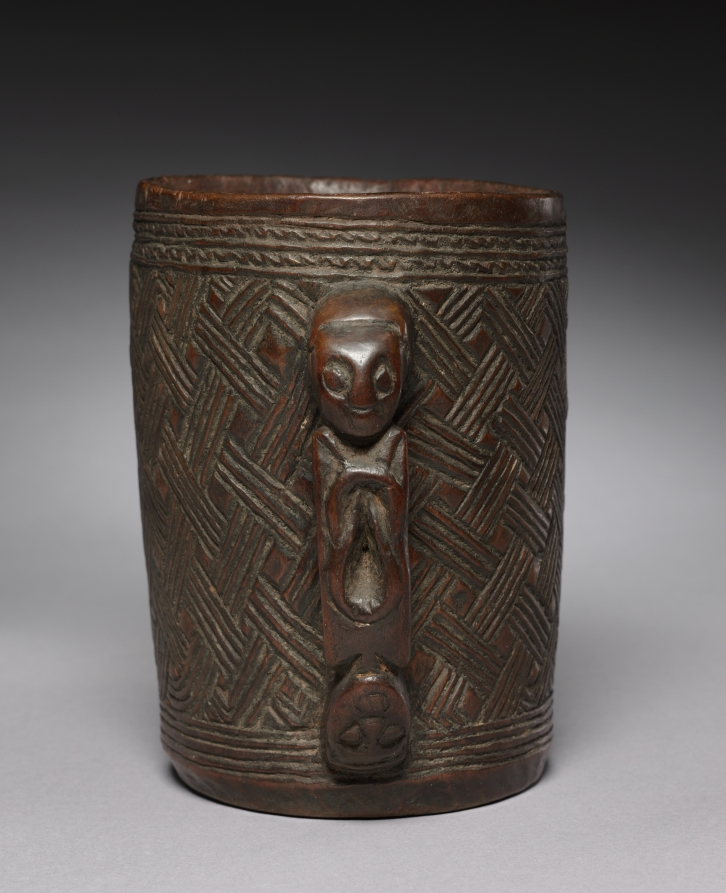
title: Cup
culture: Africa, Central Africa, Democratic Republic of the Congo, Kuba-style maker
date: early 1900s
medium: Wood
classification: Vessels